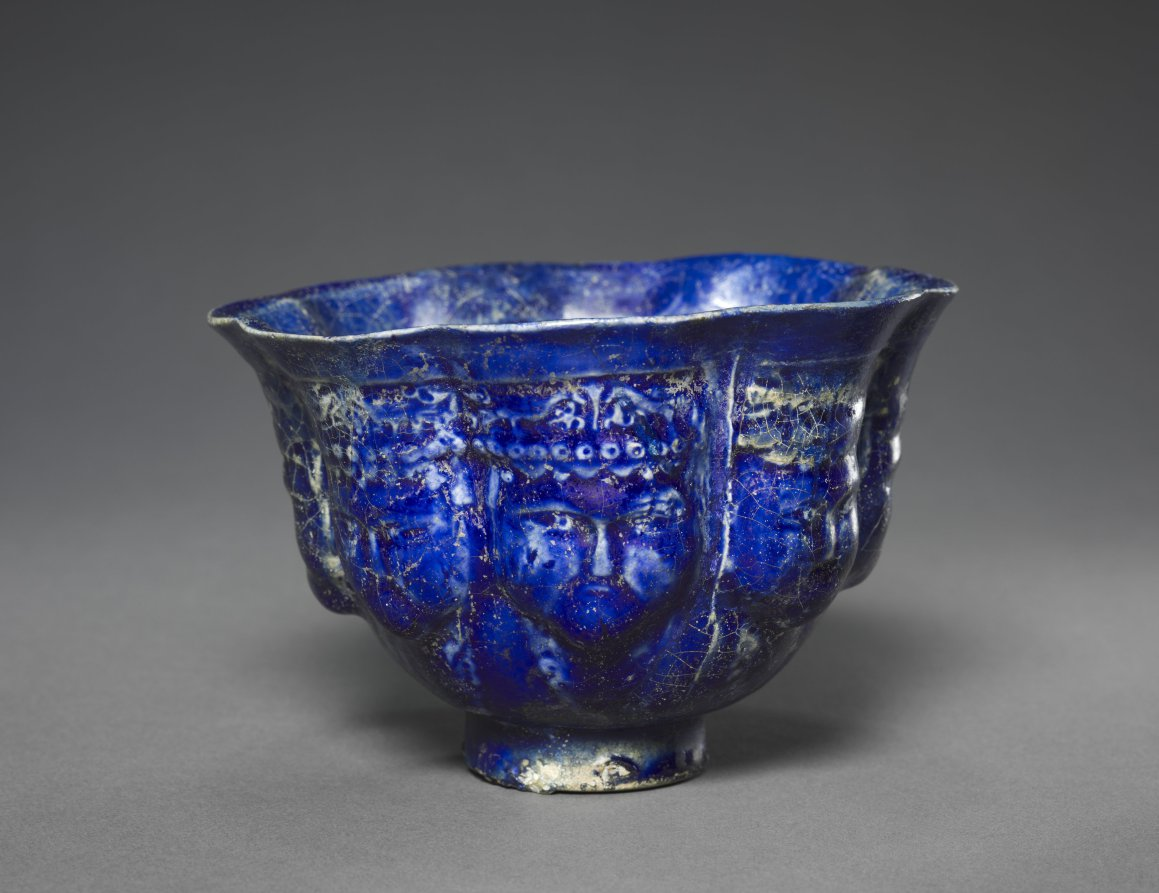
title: Bowl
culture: Iran, probably Kashan, Seljuk Period, 12th-13th Century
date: 1150–1220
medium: fritware with molded design under glaze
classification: Ceramic